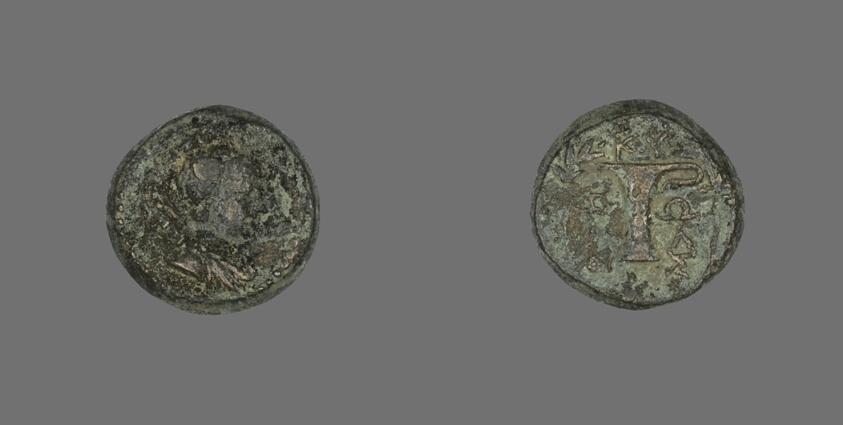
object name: Coin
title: Coin Depicting the Goddess Artemis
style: greek, ancient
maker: Greek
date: after 190 BCE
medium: Bronze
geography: Ancient Greece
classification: coin; ancient art